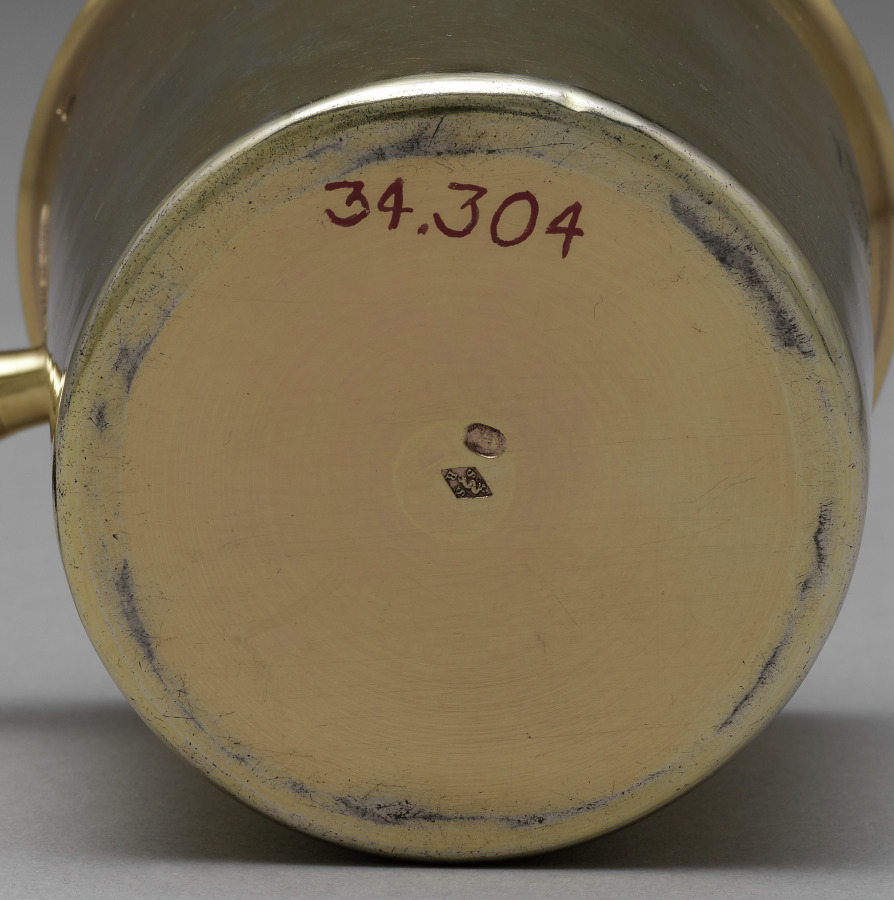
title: Chocolate Pot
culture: France, 19th century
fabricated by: Sixte-Simon Rion (French)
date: c. 1830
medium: silver, wooden handle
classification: Silver